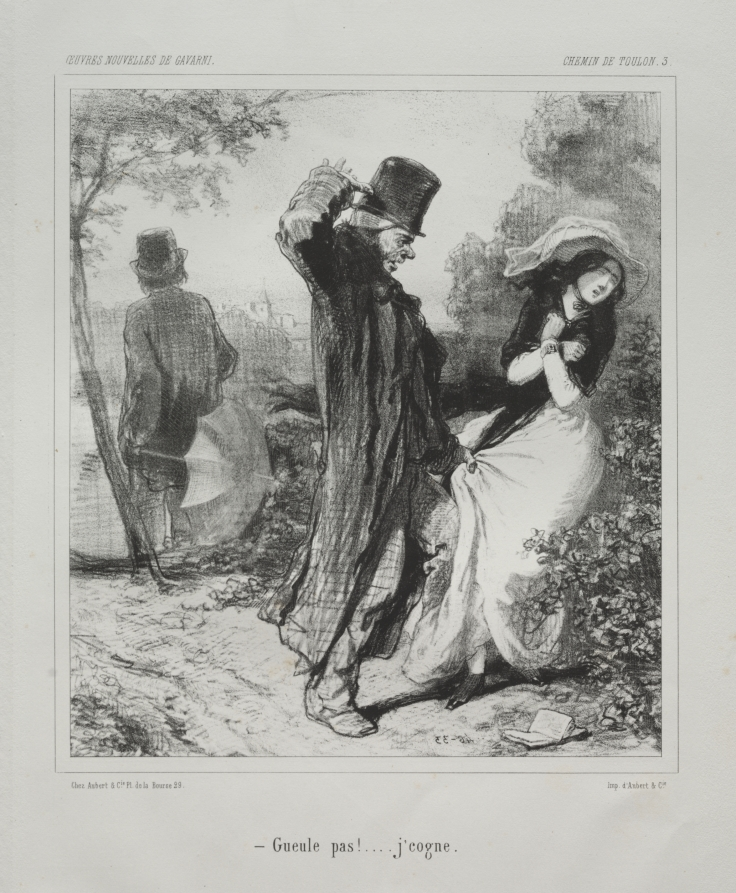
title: Chemin de Toulon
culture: France, 19th century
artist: Paul Gavarni (French, 1804–1866)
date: c. 1846–47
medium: lithograph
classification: Print